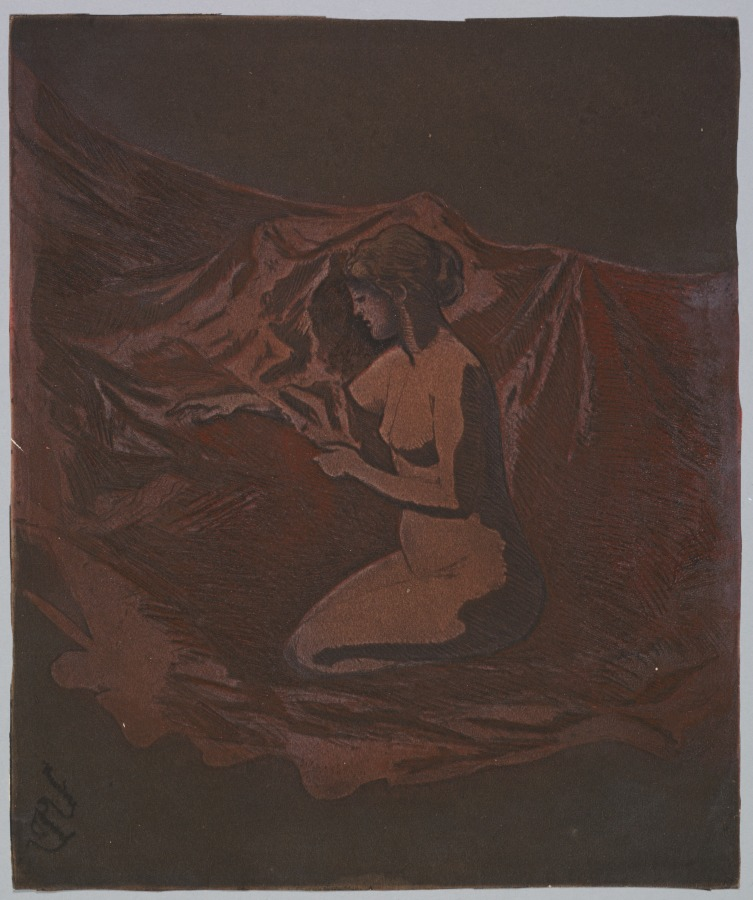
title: Embers Glow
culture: France, 19th century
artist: Theodore Roussel (French, 1847–1926)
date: 1890–1897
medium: color etching and aquatint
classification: Print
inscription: verso, in graphite: 8